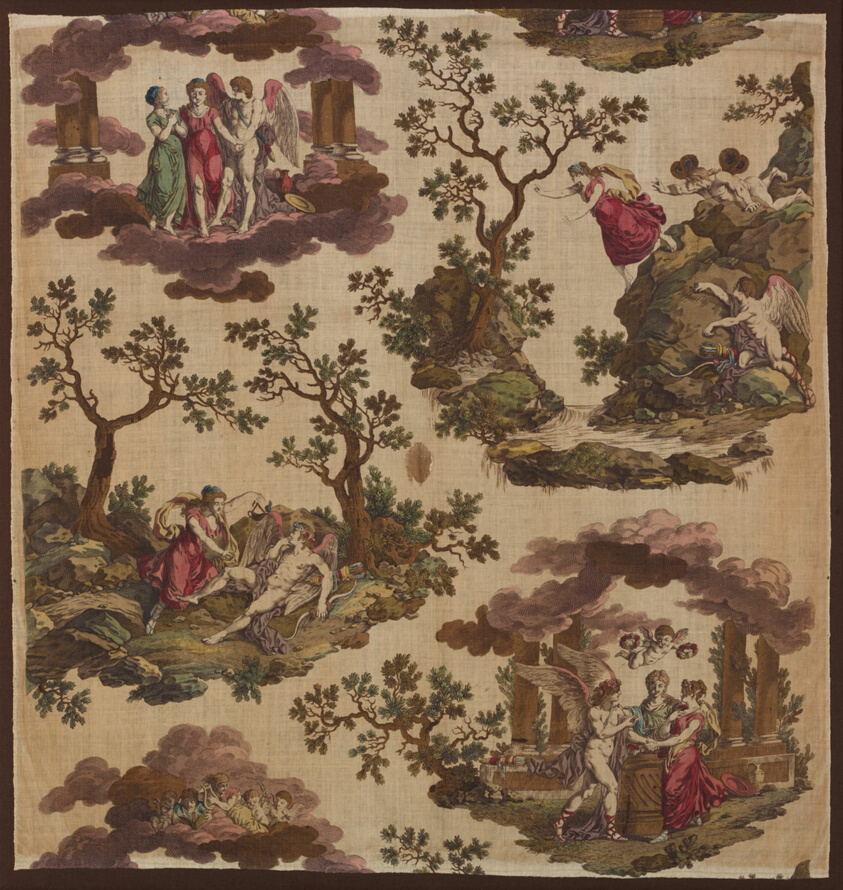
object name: Textile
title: Psyche et L'Armour (The Story of Cupid and Psyche) (Furnishing Fabric)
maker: Manufactured by Gorgerat Frères et Cie (French, 1783-1815); France, Nantes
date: c. 1790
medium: Cotton, plain weave; copperplate printed; painted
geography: Nantes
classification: textile; weaving - printed; furnishing textile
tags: mythology